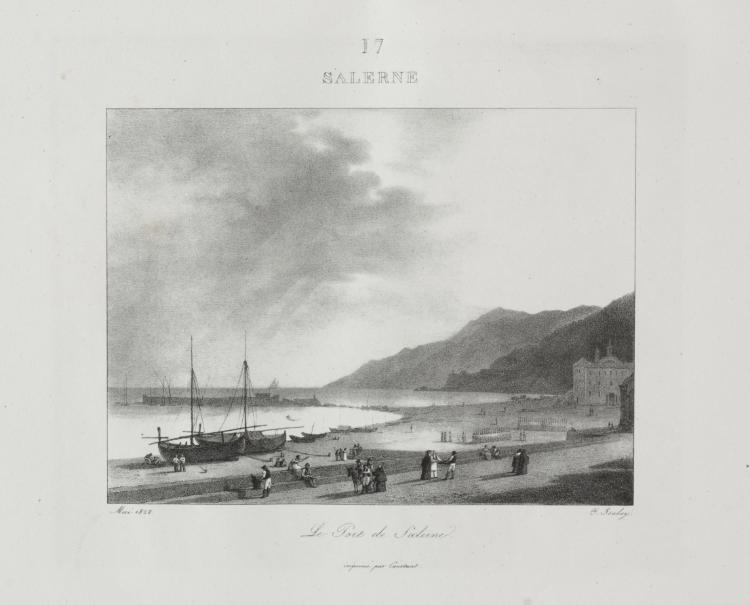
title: Voyage en Italie en 1822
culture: France, 19th century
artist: Jean-Baptiste Isabey (French, 1767–1855)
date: 1833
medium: lithograph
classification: Bound Volume